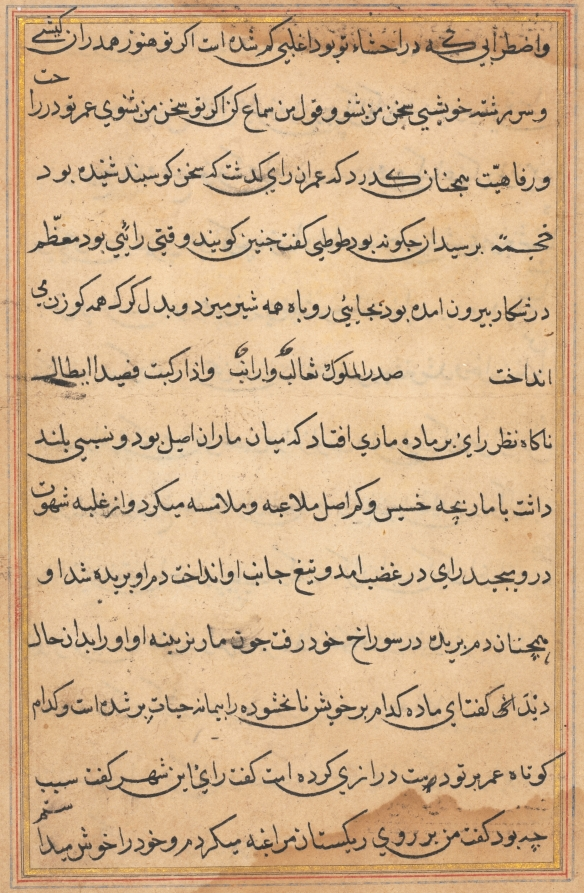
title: Page from Tales of a Parrot (Tuti-nama): text page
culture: Mughal India, court of Akbar (reigned 1556–1605)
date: c. 1560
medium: gum tempera, ink, and gold on paper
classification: Painting